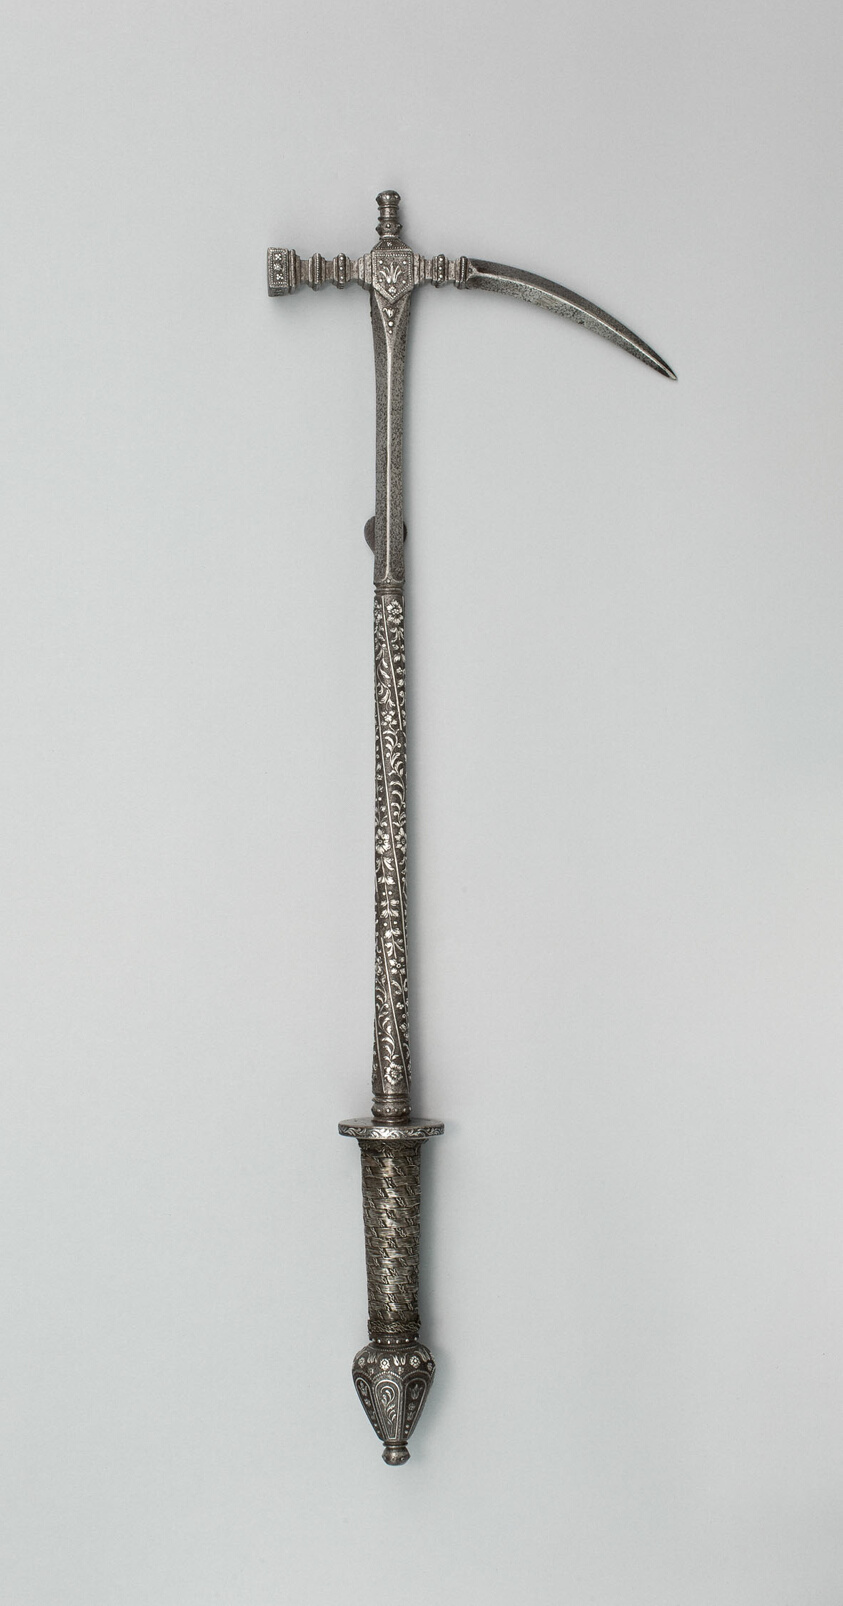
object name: Arms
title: War Hammer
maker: German, possibly French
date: early 17th century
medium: Iron and silver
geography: France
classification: shafted weapon; arms; arms and armor